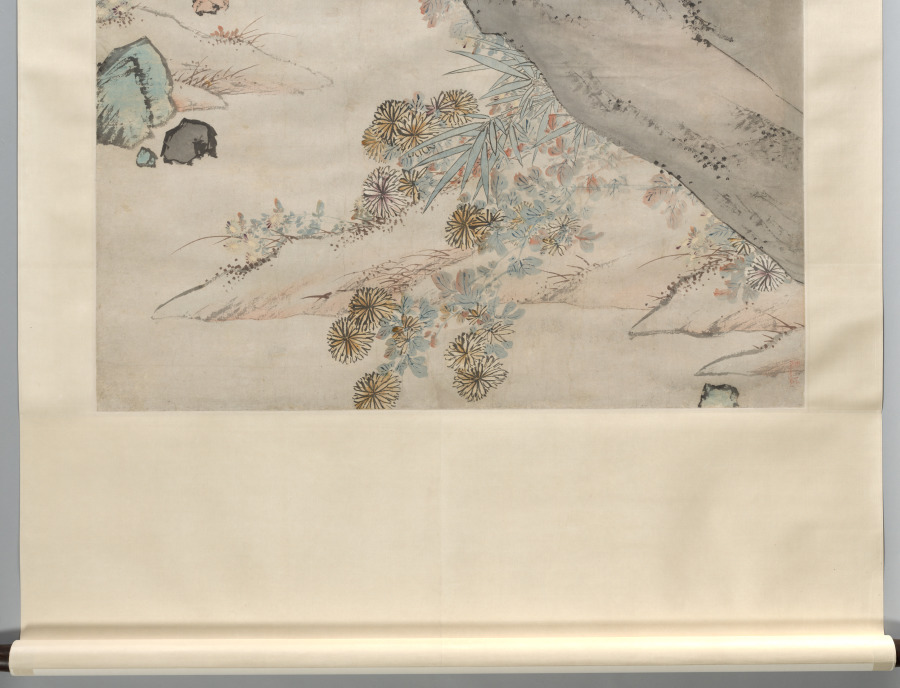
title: Yellow Chrysanthemums and Red Osmanthus in the Style of Wang Yuan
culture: China, Ming dynasty (1368–1644)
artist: Shen Zhou (Chinese, 1427–1509)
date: 1468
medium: hanging scroll, ink on paper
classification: Painting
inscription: Artist's inscription, signature, and 2 seals at upper right: Beneath the fence yellow [chrysanthemum] flowers brave the rain to blossom;/ Still others lean on the red osmanthus tree and dazzle the deep green moss./ With a goblet [of wine] I face them, entirely without concern;/ Who will answer the knocking at the gate where a guest has arrived? In the ninth month of the fourth year of the Chenghua era [1468], I followed the brush-conception of Wang Danxuan 王澹軒 [Wang Yuan 王淵] at the Youzhuzhuang 有竹庄 [House with Bamboo]. Inscribed and [painted] by Shen Zhou 沈周 of Changzhou 長洲. [seals] Shitian 石田; Shen shi Qinan 沈氏启南. trans. HR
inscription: 1 additional inscription, dated 1523, and 2 seals of Wang Chong 王寵 (1494-1533).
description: Shen Zhou, a native from Suzhou, was descended from a prominent land-owning family with strong ties to literati culture. Because Shen Zhou never entered government service, he had ample opportunity to cultivate the arts of painting, poetry, and calligraphy. Chrysanthemums and red osmanthus both bloom in autumn. The deep orange osmanthus flowers emanate a characteristically sweet fragrance. According to his inscription on the painting, Shen Zhou sought to imitate the style of the Yuan dynasty (1271–1368) painter Wang Yuan. His color-filled brushstrokes and washes, however, anticipate the flower painting style of Yun Shouping, whose Peonies are also in the Cleveland Museum of Art collection, https://www.clevelandart.org/art/1967.192. The sheer size and complex composition of this scroll are impressive.